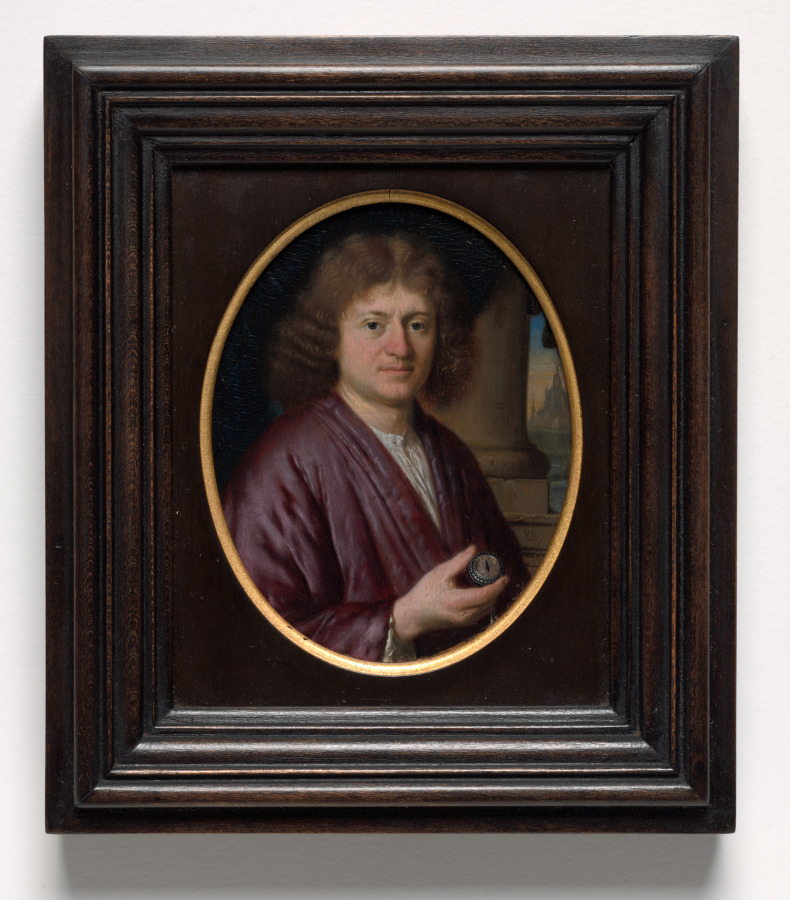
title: Portrait of a Man Holding a Watch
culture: Netherlands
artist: Pieter Cornelisz van Slingelandt (Dutch)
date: c. 1665–70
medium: oil on wood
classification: Painting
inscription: signed with monogram at right, lower center: PVS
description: Held in the hand or displayed in a private domestic space, miniature portraits were designed for intimate viewing. The sitter holds a watch, often a symbol of mortality and the passage of time. Like his colleague Gerrit Dou, Slingelandt was one of the Leiden fijnschilders (fine painters), a group of artists whose paintings were internationally recognized for their extraordinary detail and precise technique.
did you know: The domed building in the background of this portrait is the Marekerk, one of Leiden's most distinctive architectural landmarks.